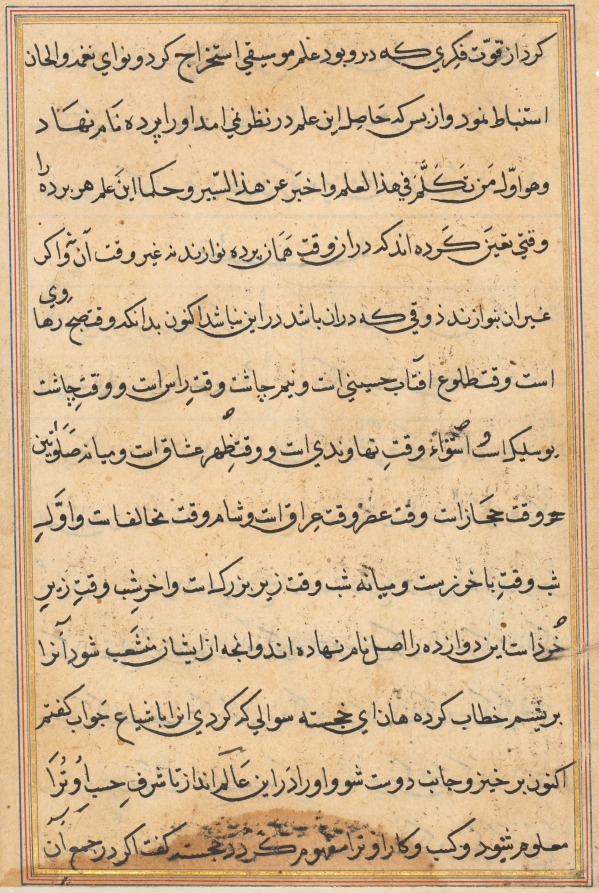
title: Page from Tales of a Parrot (Tuti-nama): text page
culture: Mughal India, court of Akbar (reigned 1556–1605)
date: c. 1560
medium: gum tempera, ink, and gold on paper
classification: Painting